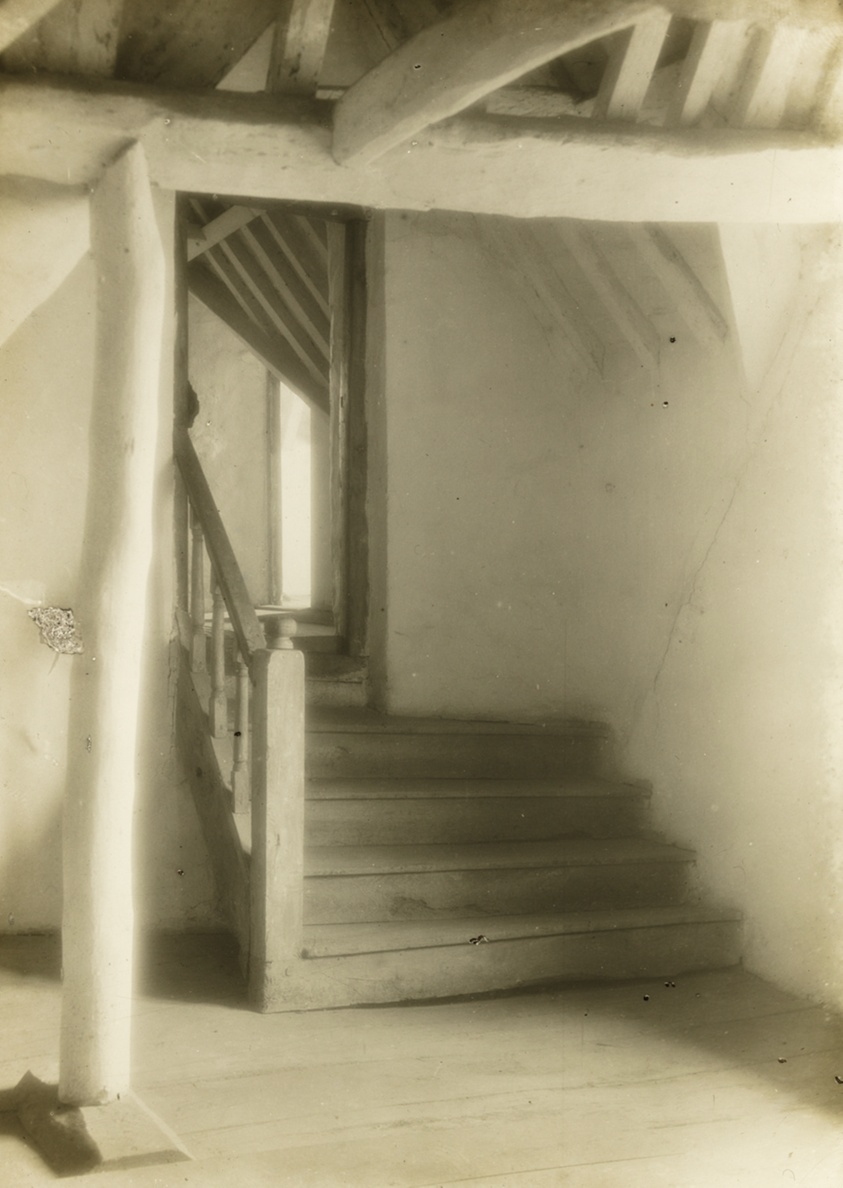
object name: Photograph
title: Kelmscott Manor: In the Attics (No.2)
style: Pictorialism, 19th century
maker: Frederick H. Evans (English, 1853–1943)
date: 1896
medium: Lantern slide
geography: England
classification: photograph; photography